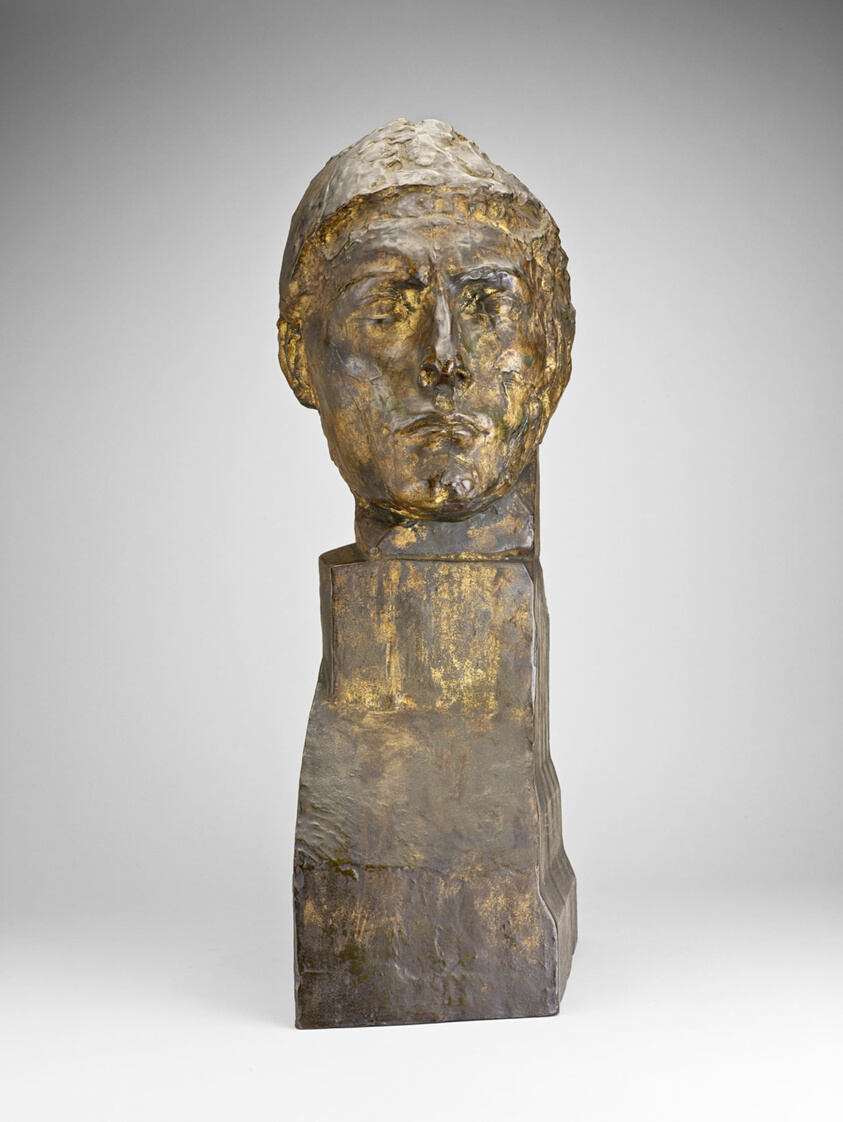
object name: Sculpture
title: Head of Apollo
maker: Emile-Antoine Bourdelle (French, 1861-1929)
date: 1900–1909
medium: Bronze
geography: France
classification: bronze; metal; sculpture; modern and contemporary art